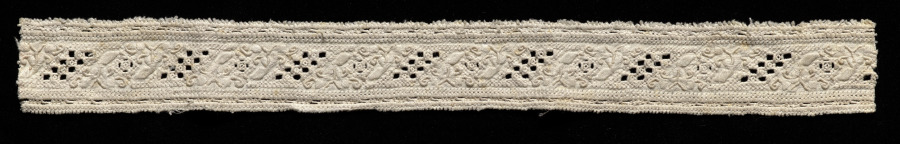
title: Lace Band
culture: Italy, 1600s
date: 1600s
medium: Linen: needle lace (cutwork)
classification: Lace